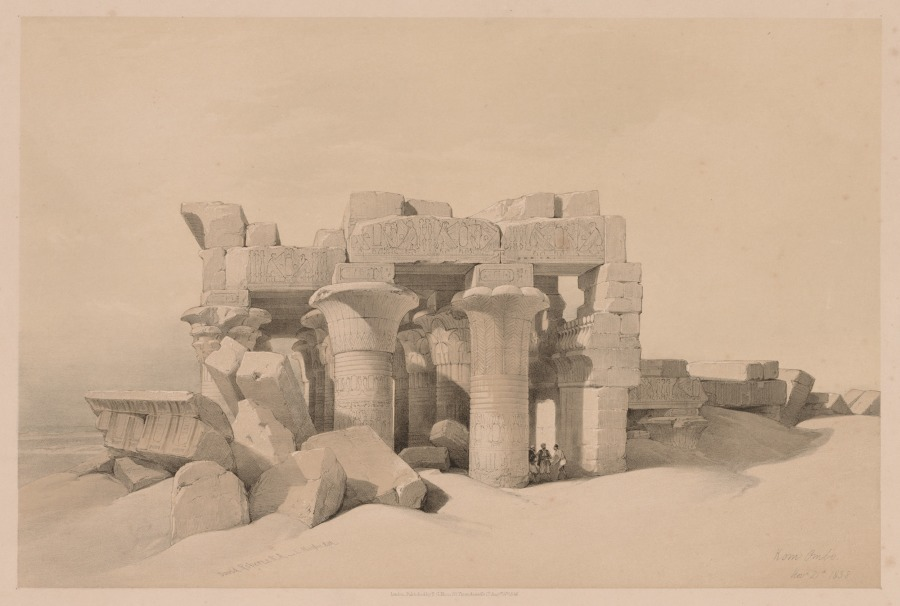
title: Egypt and Nubia: Volume II - No. 42, Ruins of Kom Ombo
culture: England, 19th century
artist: Louis Haghe (British, 1806–1885)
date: 1838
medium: color lithograph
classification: Print